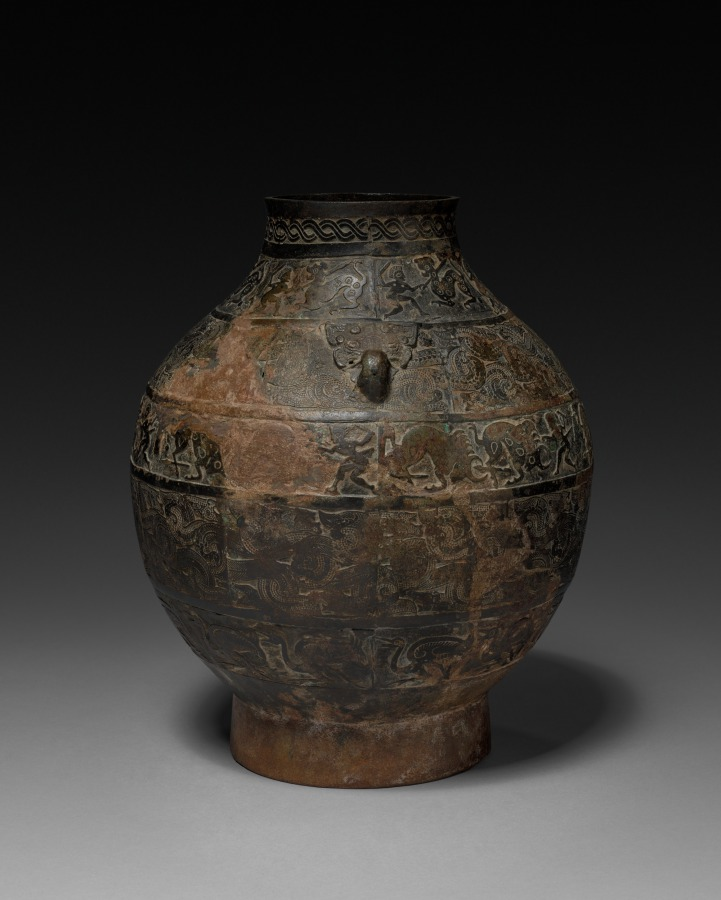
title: Hu (Jar)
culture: China, Eastern Zhou dynasty (770–256 BCE), Warring States period (475–221 BCE)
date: 481–221 BCE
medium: bronze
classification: Metalwork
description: The hunting scenes in flat, low relief on this vessel are among the earliest pictorial scenes in Chinese art, dating from the beginning of the Late Zhou period (481–221 BC). There are six horizontal bands of low relief designs across the body of the vessel. Each is composed of repeating motifs. The short slightly flaring neck has a narrow band of plait pattern, below which is a vivid hunting scene. The hunter holding a long spear and a sword faces off with a feline covered in circle patterns. The main body of the vessel is decorated with two wide bands of interlacing dragons, separated by a band with another hunting scene. This hunter faces two horned beasts whose rear leg has been pierced by a spear. The repeating pattern in the lowest band features two long-legged birds and a small fish.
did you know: On the vessel’s shoulders are applied taotie masks from which stem vertical loops for holding the vessel possibly with a rope.